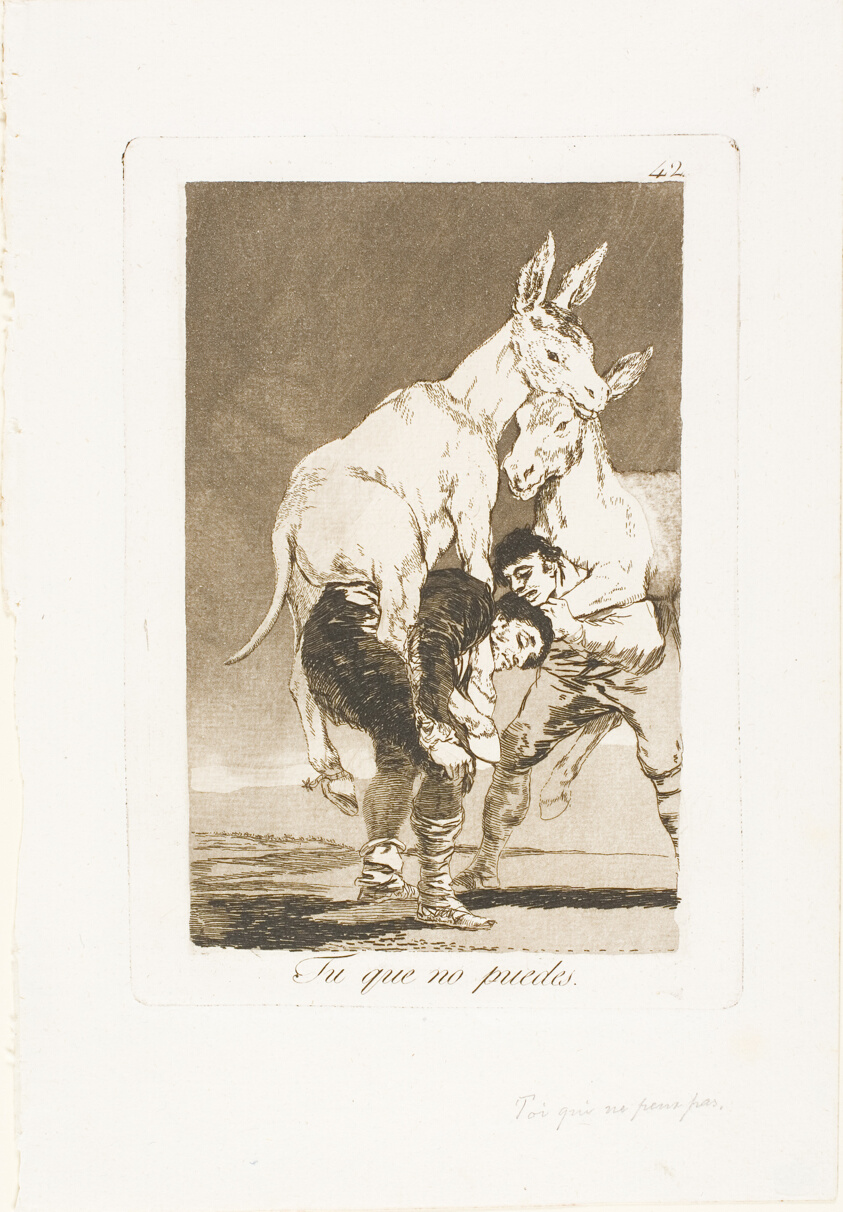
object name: Print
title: Thou Who Canst Not, plate 42 from Los Caprichos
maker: Francisco José de Goya y Lucientes (Spanish, 1746-1828)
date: 1797/99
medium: Etching and aquatint on ivory laid paper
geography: Spain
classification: etching; print; prints and drawing